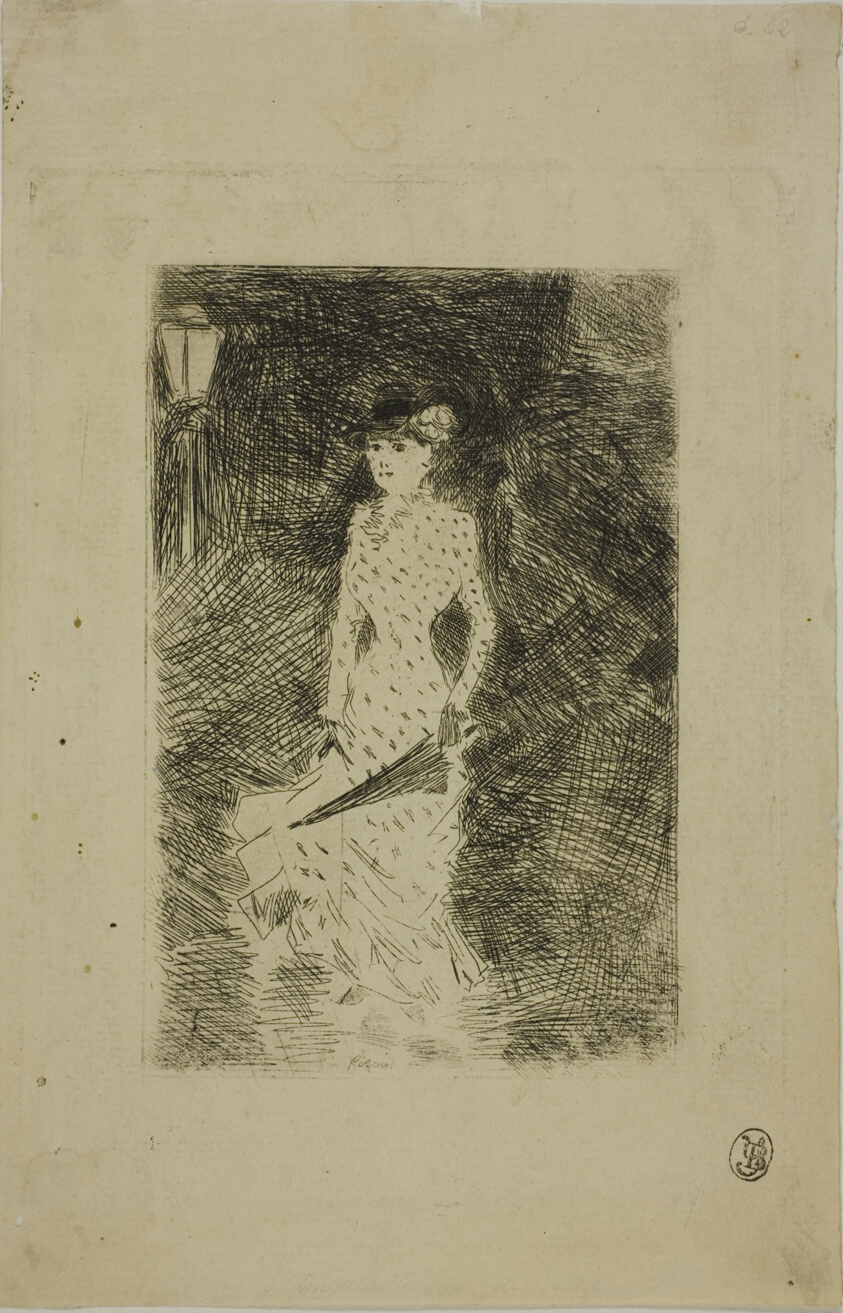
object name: Print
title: Strolling Woman with Umbrella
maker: Jean Louis Forain (French, 1852-1931)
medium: Etching on buff laid paper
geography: France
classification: etching; print; prints and drawing